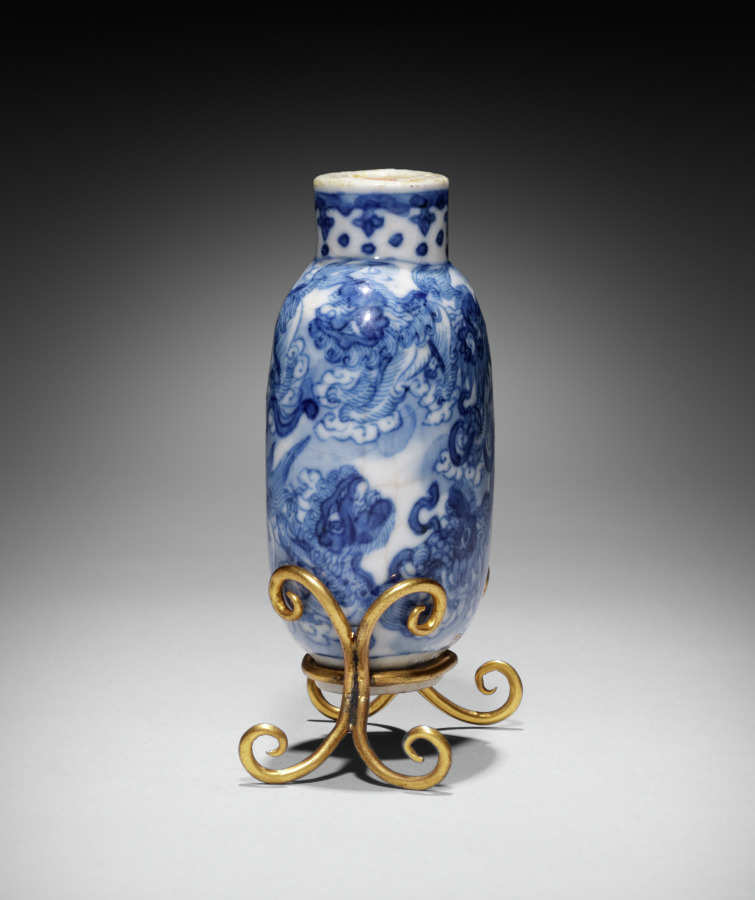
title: Flattened Ovoid Snuff Bottle with Stopper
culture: China, Jiangxi province, Jingdezhen kilns, Ming dynasty (1368-1644), Wanli reign (1572-1620)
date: 1573–1620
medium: porcelain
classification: Ceramic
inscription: 萬曆年製